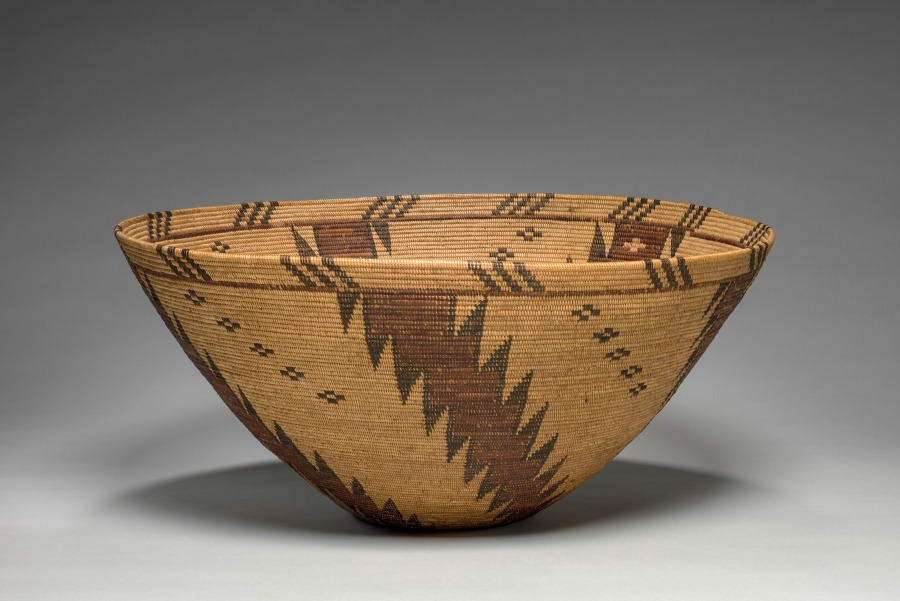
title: Presentation Bowl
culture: Native North America, Great Basin, California, Death Valley, Timbisha (Panamint) Shoshone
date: 1880–90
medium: devil's claw, sumac, yucca root, orange-shafted flicker (woodpecker) quills; coiled (2 rod and bundle of deer grass or basket grass)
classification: Basketry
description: This basket was made for the Euro-American collectors’ market in the early 1900s but it is modeled on basketry bowls from which the Timbisha (Panamint) Shoshone once served food. When used indigenously, the main view would have been of the interior. The two small, pink crosses, made of flicker (woodpecker) quills, may be a maker’s mark. Made-for-sale baskets testify to Indigenous women’s truly creative, resilient responses to forces that endangered their livelihoods and existence.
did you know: The two small, pink crosses on this basket may be a maker’s mark.